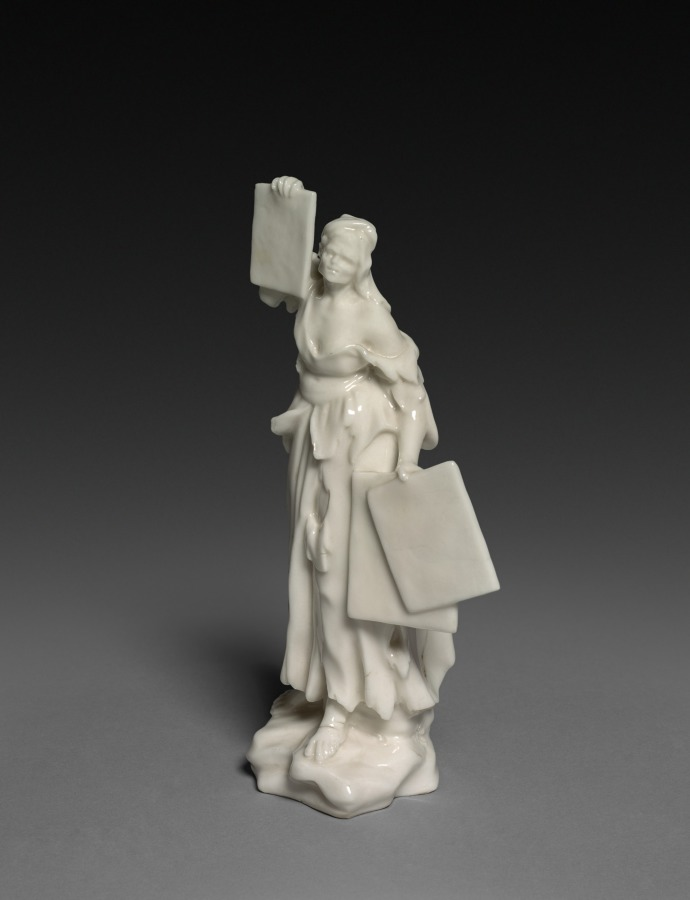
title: Print Seller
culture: Italy, Naples, Capo di Monte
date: c. 1750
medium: porcelain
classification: Ceramic